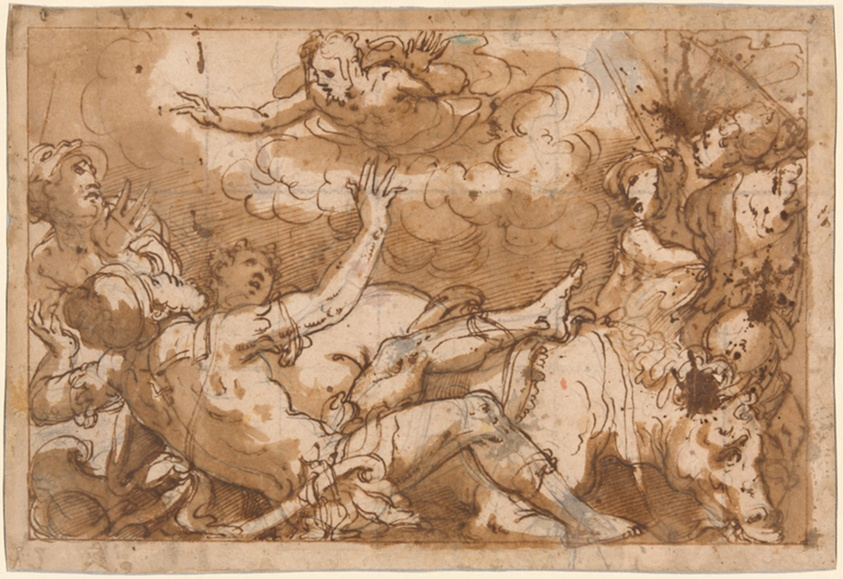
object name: Drawing and Watercolor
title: The Conversion of Saint Paul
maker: Giorgio Vasari (Italian, 1511–1574)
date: 1554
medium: Pen and brown ink, brush and brown wash, with splatters of gray, green and pink paint over black chalk, squared in black chalk, on cream laid paper, with framing lines in pen and brown ink, laid down on secondary paper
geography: Italy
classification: drawings (visual works); brush and wash; paper; pen and ink drawings; prints and drawing